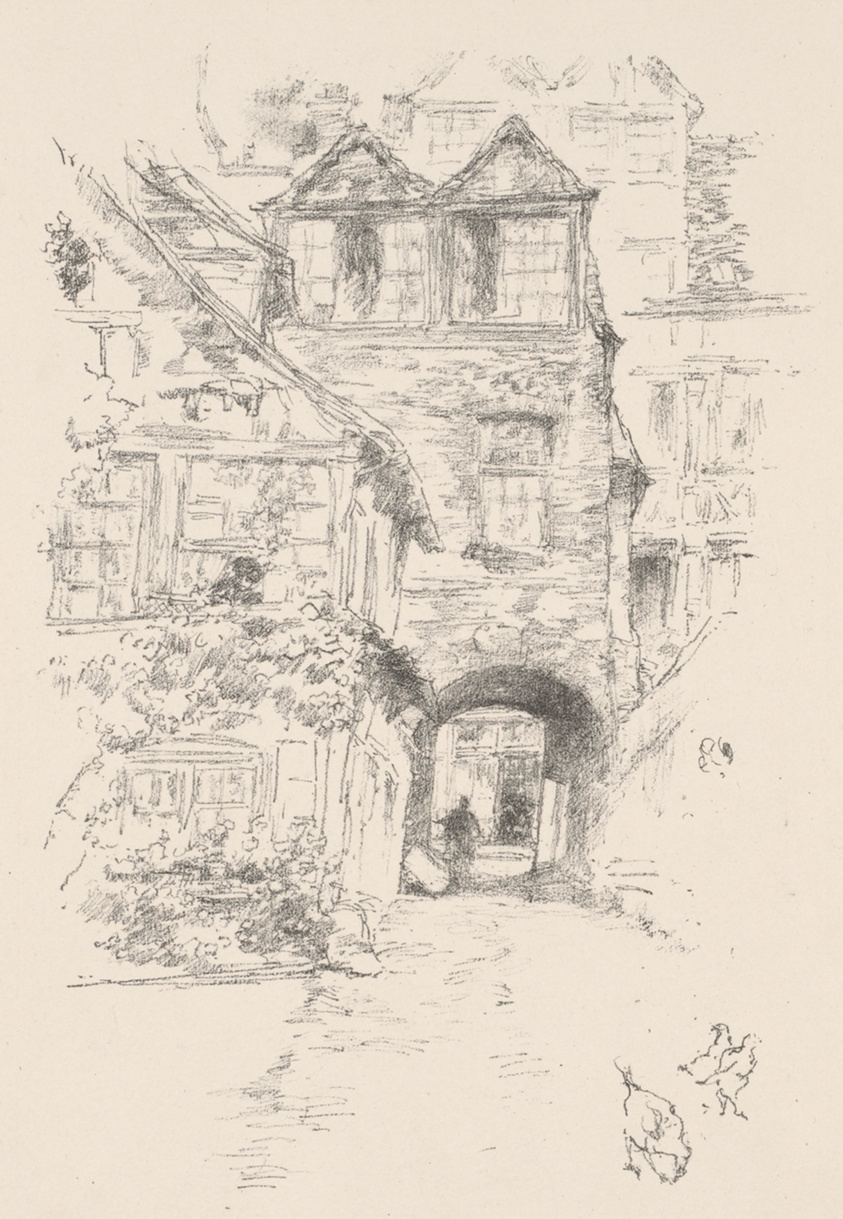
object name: Print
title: The Priest's House, Rouen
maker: James McNeill Whistler (American, 1834-1903)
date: 1894/95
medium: Transfer lithograph in black with stumping and scraping, on off-white chine, laid down on white plate paper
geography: United States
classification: transfer lithograph; lithograph; print; prints and drawing; paper